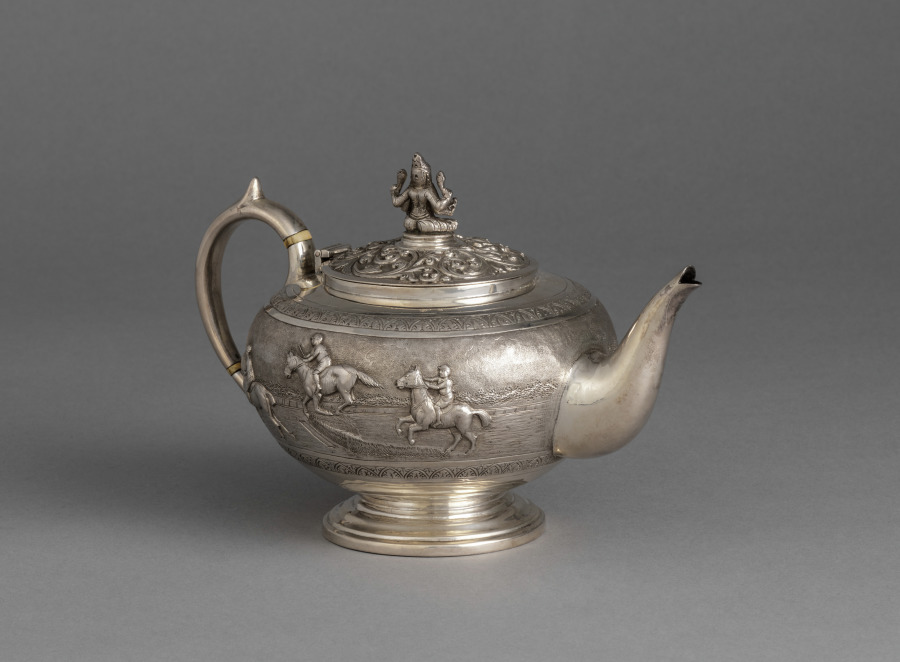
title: Teapot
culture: India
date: c. 1860–90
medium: silver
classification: Silver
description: Made either for export or to appeal to the British community living in colonial splendor in India, this pot is a rare testament to the influence of the British Empire on consumer design during the period. Shri Lakshmi, the Hindu goddess of wealth, crowns the vessel as an apt divinity to preside over the horse races depicted on the belly of the teapot.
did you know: The Hindu goddess of wealth on the lid has four arms, two of which hold lotus flowers.